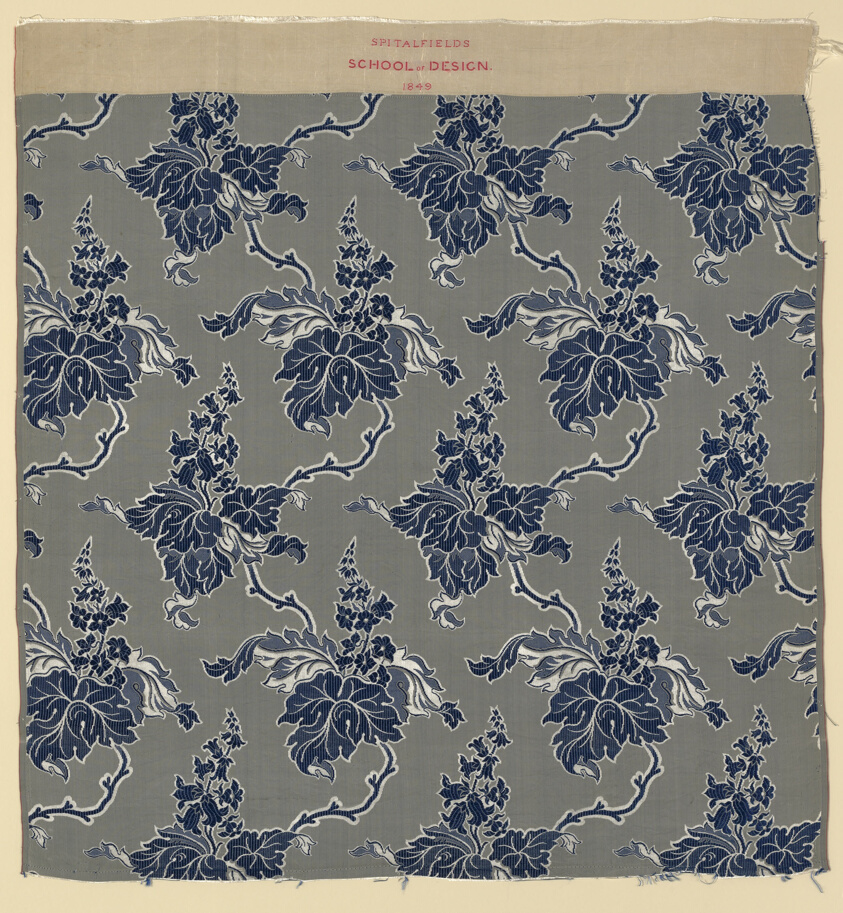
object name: Textile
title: Panel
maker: England, Spitalfields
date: 1849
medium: Silk, warp-float faced 7:1 satin weave self-patterned by areas of plain weave and ground weft floats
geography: Spitalfields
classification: textile; weaving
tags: flowers